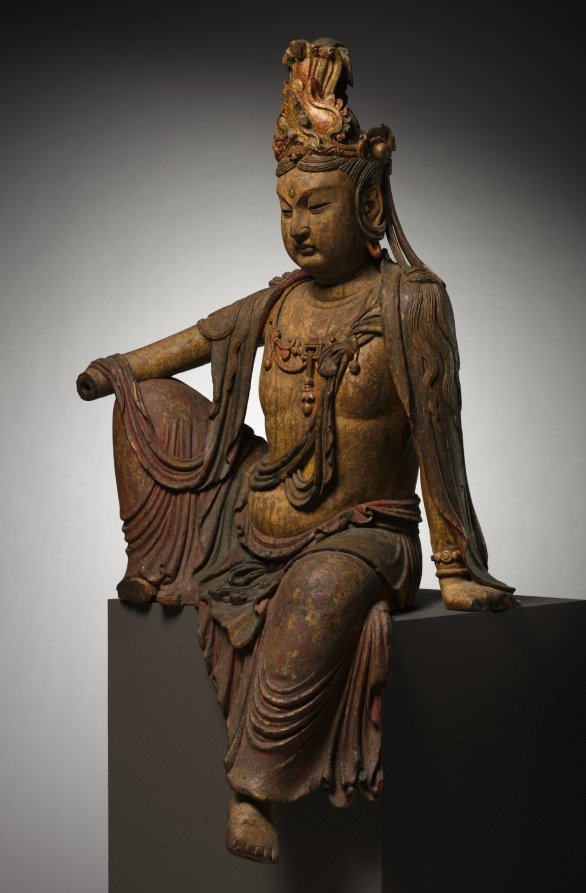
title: Seated Guanyin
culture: China, late Northern Song dynasty (960-1127) - Jin dynasty (1115-1234)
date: late 1100s–1200s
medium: wood with polychromy and gilding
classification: Sculpture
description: The South Sea Guanyin was originally seated on a rocky throne to represent the shore of his home in the mythical island of Potala. His right leg is raised, the arm resting on the folded knee in a relaxed position. With an expression of grace, calmness, and compassion, the Guanyin is especially appealing as the "guide of souls" who offers hope for salvation.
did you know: After acquisition, the CMA conservator meticulously used surgical knives and etching tools to uncover the sculpture's original polychromy and gilding, hidden beneath layers of protective varnish and paint.